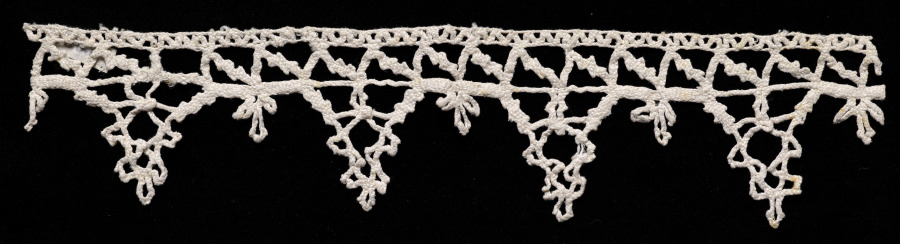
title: Lace Edging with Points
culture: Italy, Venice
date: 1540–60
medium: Bobbin lace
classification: Lace